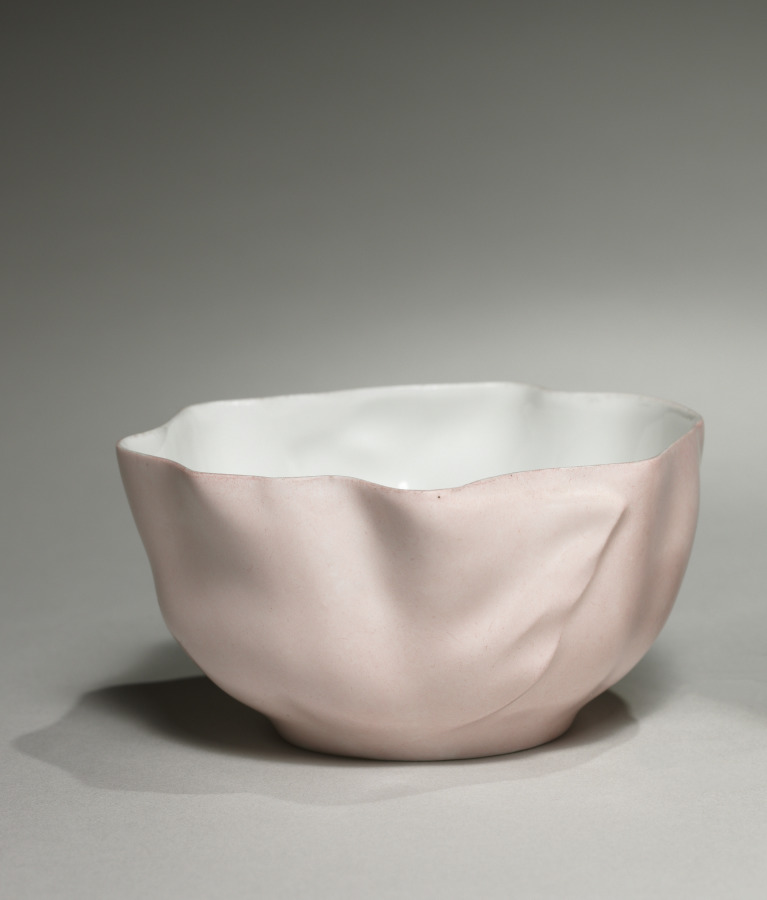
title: Service Aïda: Bowl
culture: France, Limoges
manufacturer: Jean Pouyat Factory (French)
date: c. 1880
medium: porcelain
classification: Ceramic